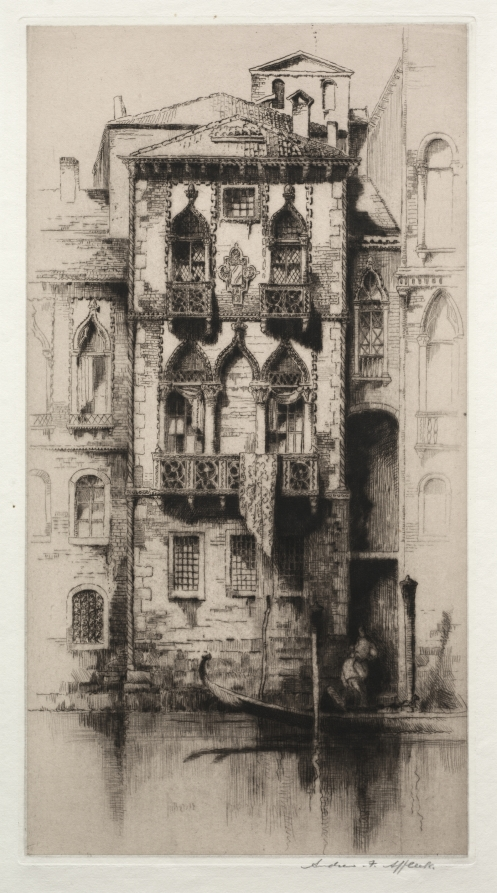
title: Palazzo Contanni, Venice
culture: England, 20th century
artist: Andrew F. Affleck (British, 1874–1935)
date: 1920–1929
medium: etching and drypoint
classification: Print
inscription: lower margin, in graphite: Andrew F. Affleck